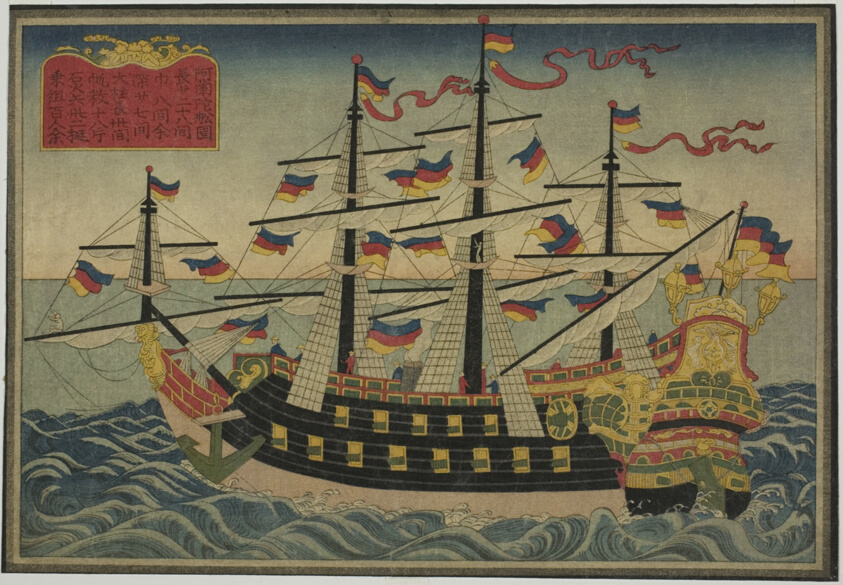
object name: Print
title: Dutch Ship, from the set of eight Pictures of Foreign Ships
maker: Unknown Artist (Japanese, date unknown)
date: 1840s–1850s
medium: Color woodblock print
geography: Japan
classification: woodblock print; print; asian art